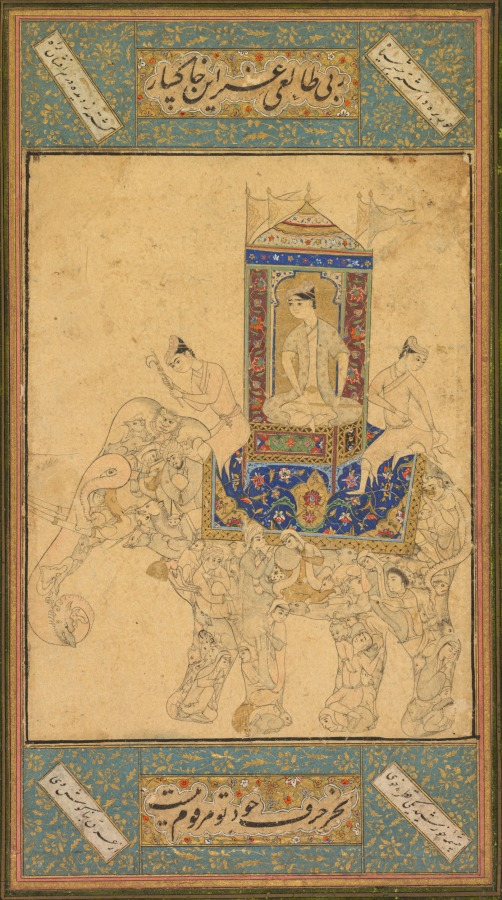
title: A prince riding a composite elephant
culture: India, Golconda, Deccan, 16th century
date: c. 1590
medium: Gum tempera, ink, and gold on paper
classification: Painting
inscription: Inscriptions: Calligraphy of Persian verses in top and bottom borders, in nasta‘liq script: Central verse (half-line on top, the other below the elephant’s feet): Given the foretold lackluster fortune of this abject servant Nothing is writ save words of your bounty Diagonal verses on top: The angelic beauties of paradise with their anxious dark-eyes set on the road Their glances throwing gold coins on the path (as a welcome) Diagonal verses below: The glittering full face of the sun is no more than a single drop From the perspiration behind his ear.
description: A prince sits cross-legged in a covered howdah seat secured to the back of a royal elephant with golden rings on its tusks. The elephant is being driven by attendants, one of whom holds a goad. Artists in the southern Indian region known as the Deccan expanded upon Persian practices of embedding creatures in landscape scenes—like a visual double-entendre—and created inventive images of composite creatures made up of figures that invite extended close looking. This painting would have been mounted in an album that was brought out for entertainment in elite intimate gatherings.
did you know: Two lions share one head at the top of the elephant’s head.